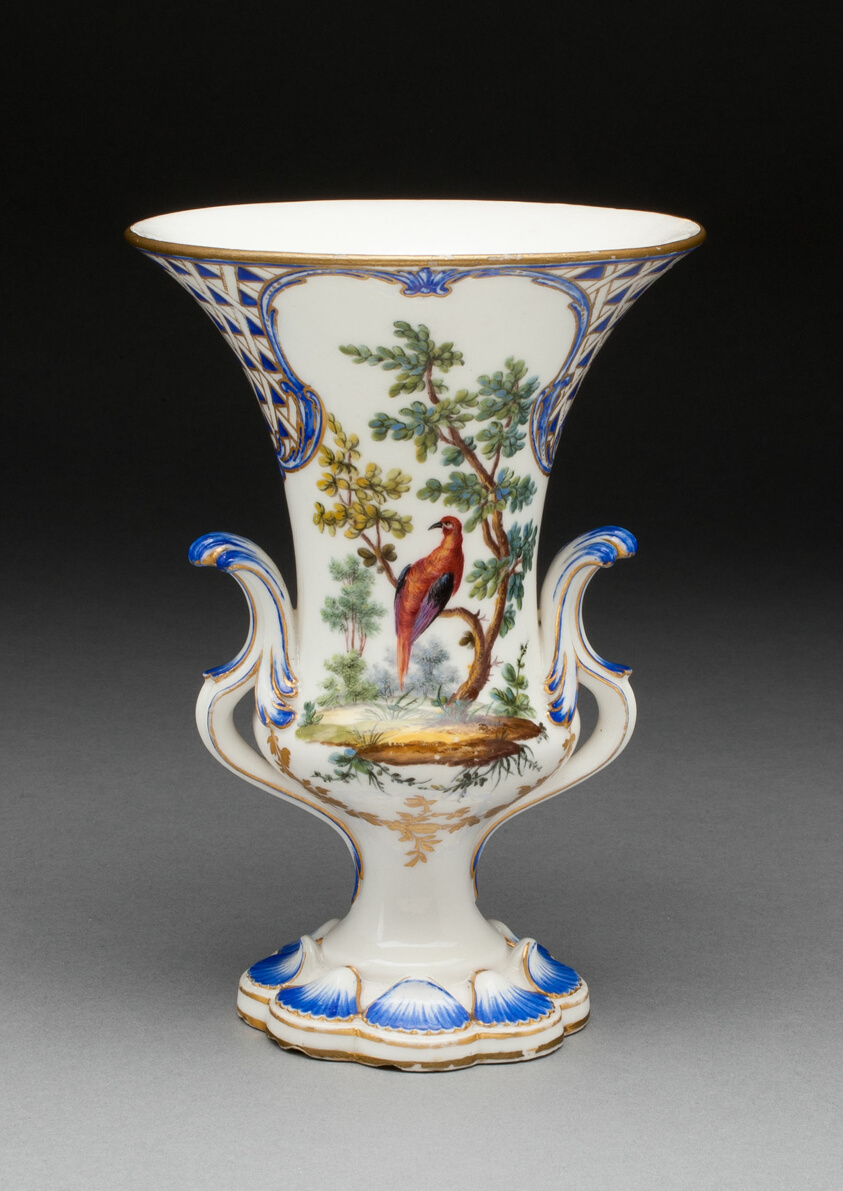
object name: Ceramics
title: Vase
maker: Sèvres Porcelain Manufactory (French, founded 1740); Probably designed by Jean-Claude Duplessis (French, c. 1695-1774)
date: c. 1760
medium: Soft-paste porcelain, polychrome enamels and gilding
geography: Sèvres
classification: vase; vessel; porcelain; ceramics; european decorative arts